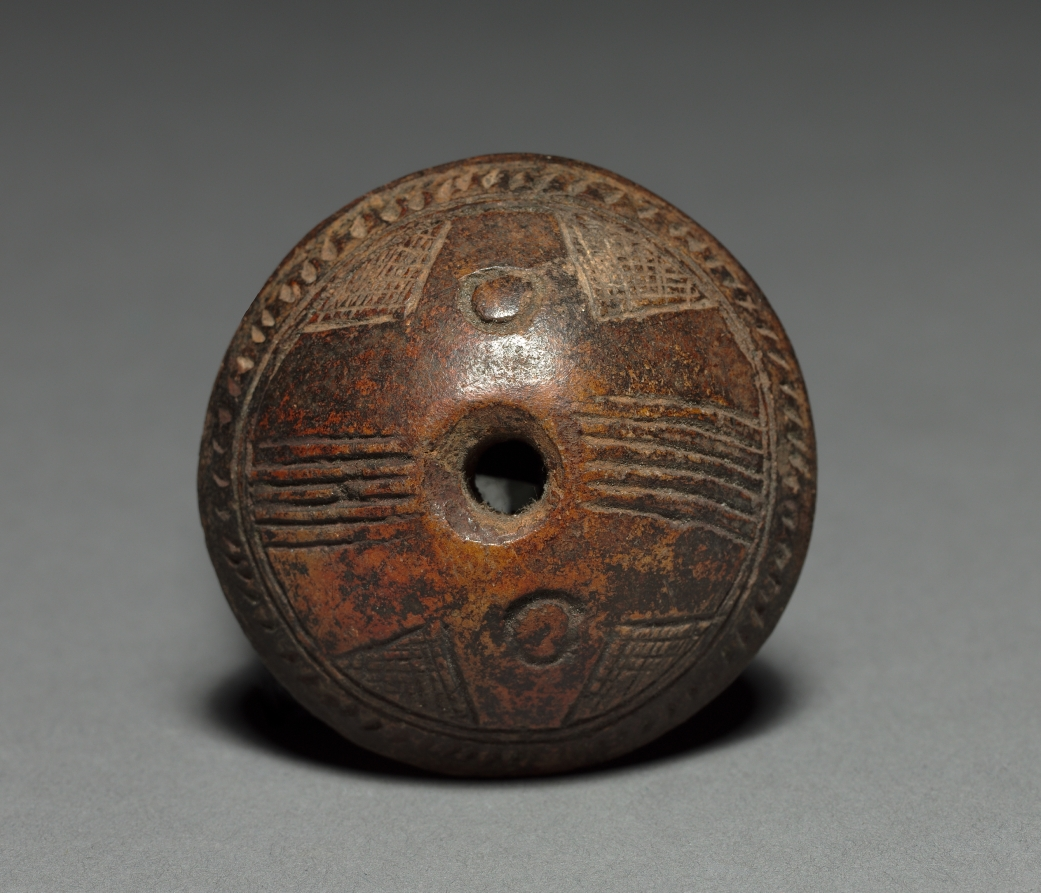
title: Spinning Whorl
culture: Colombia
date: before 1921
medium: red ware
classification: Ceramic